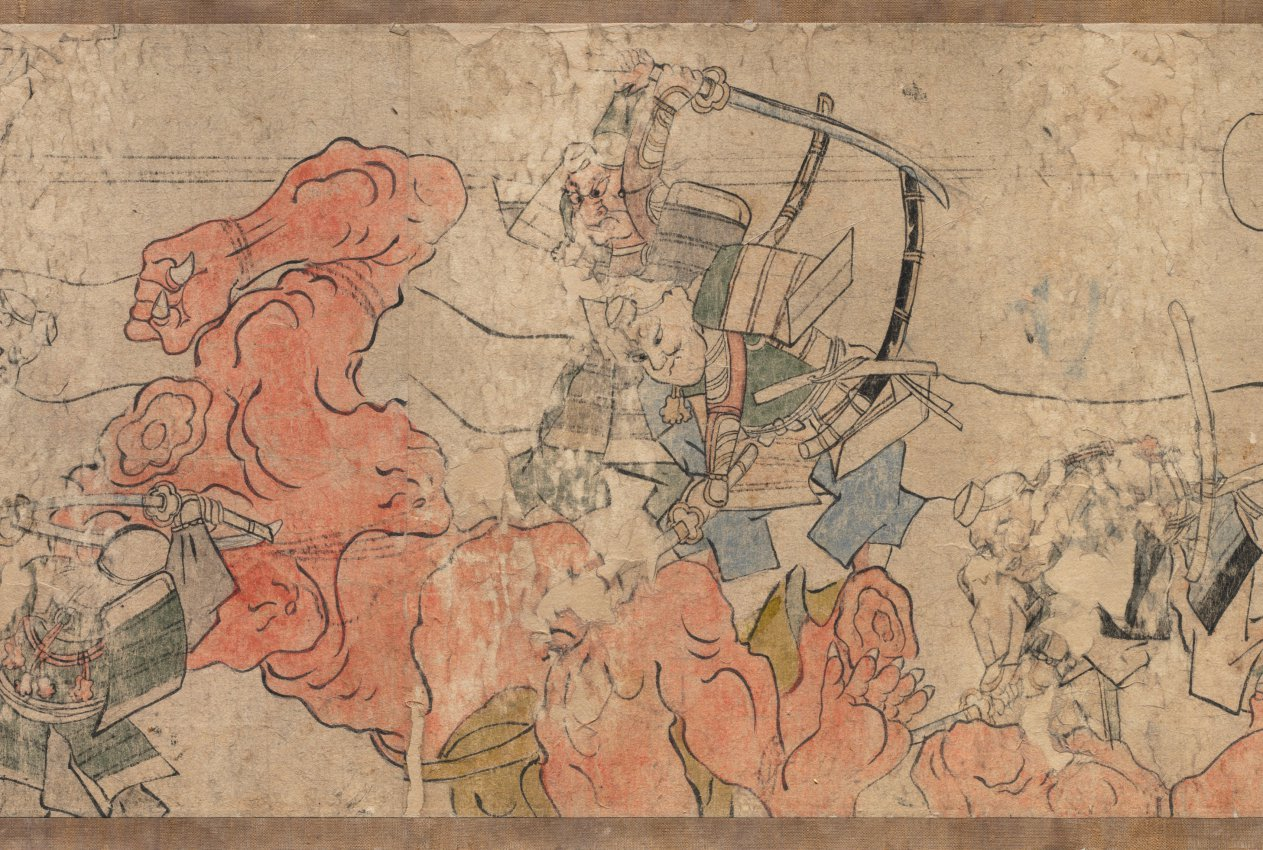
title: Oeyama Engi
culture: Japan, Edo period (1615–1868)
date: 1615–1868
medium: one of a pair of handscrolls; ink and color on paper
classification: Painting